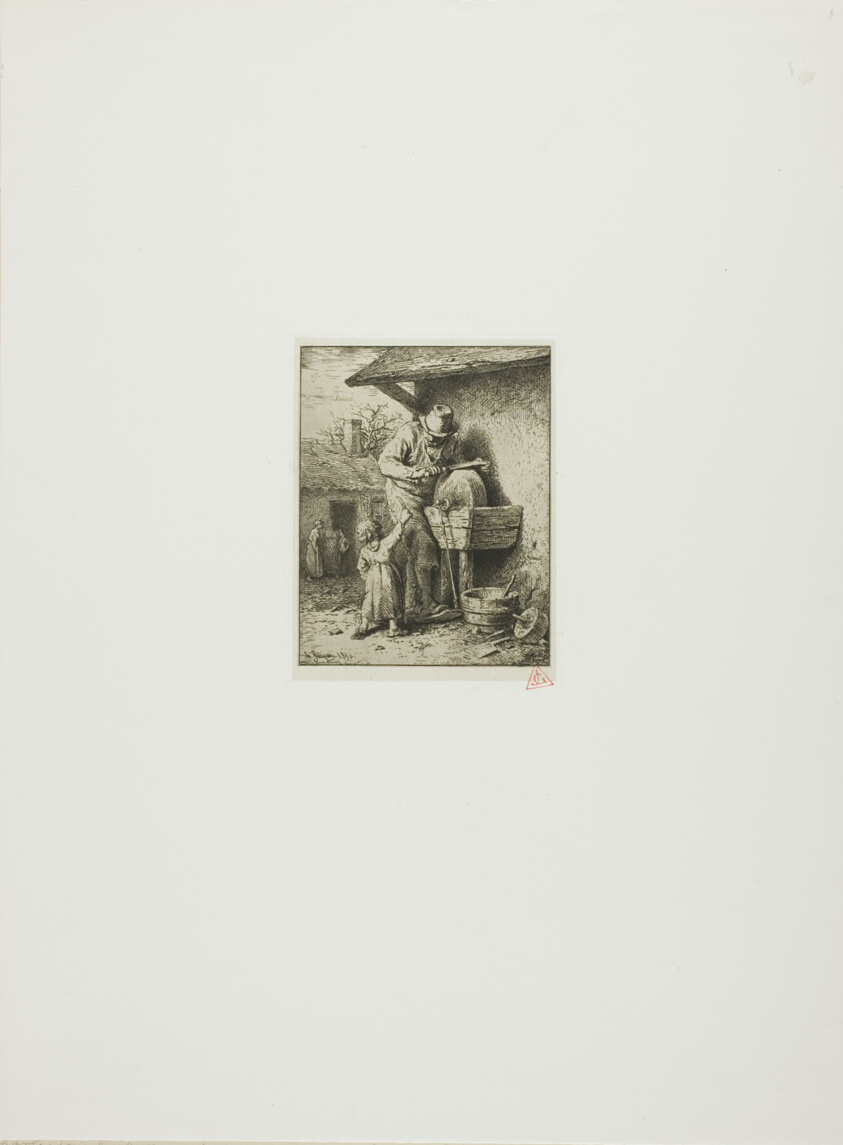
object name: Print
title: The Knife-Grinder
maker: Charles Émile Jacque (French, 1813-1894)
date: 1850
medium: Etching on cream China paper laid down on ivory wove paper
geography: France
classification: etching; print; prints and drawing